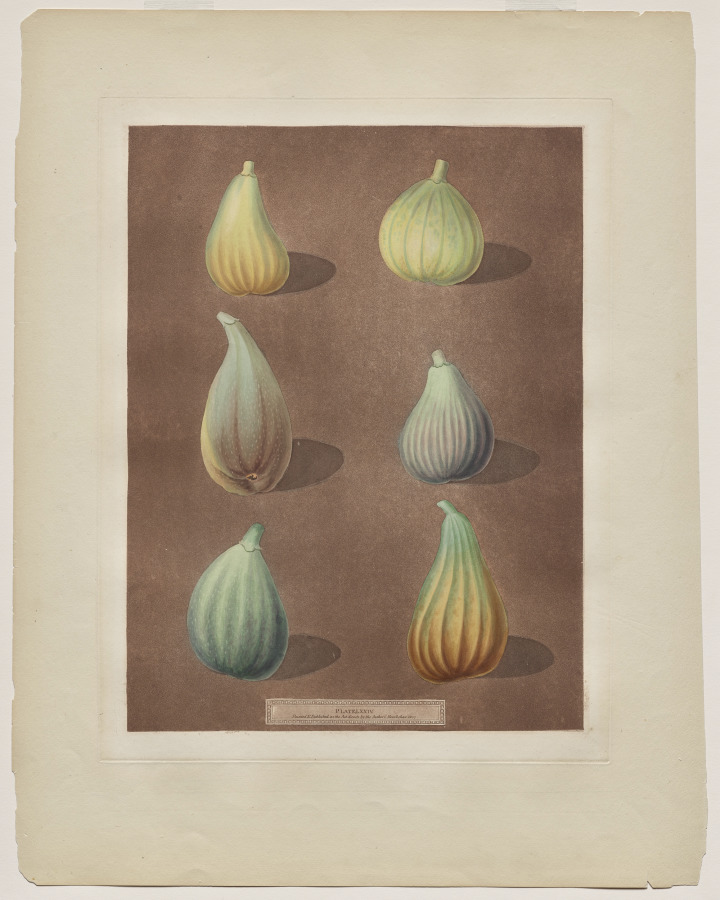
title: Pomona Britannica: No. 74 - Figs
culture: England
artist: Richard Brookshaw (British, 1736–1810)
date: 1807, published 1812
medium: aquatint and stipple engraving printed in color and hand colored on thick wove paper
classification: Print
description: This color aquatint etching is one plate from George Brookshaw’s 1812 illustrated volume Pomona Britannica. Named after the Roman goddess of fruit trees, gardens, and orchards, Brookshaw intended the volume to be the English “country gentleman’s” guide to the science of classifying and identifying fruits (pomology). Many of Brookshaw’s models came from the Royal Gardens at Hampton Court and Kensington Gardens. Each print featured one fruit, often life-size, including detailed depictions of its flower and leaves. Printed in color with hand-painted highlights, this and other illustrated botanicals formed an essential part of the cultured English library in the early 19th century.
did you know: Originally from the Mediterranean, figs were cultivated in England as early as the 1580s.